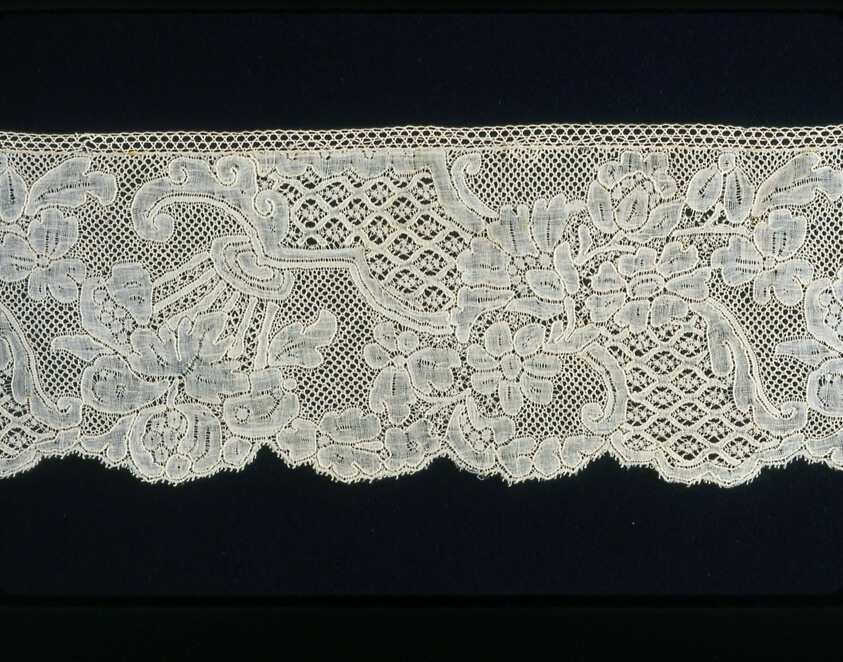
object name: Textile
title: Border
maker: Belgium, Flanders, Mechlin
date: 1755/65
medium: Linen, bobbin straight lace of a type known as "Mechlin" with a five-hole mesh ground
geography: Mechelen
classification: textile; lace - bobbin